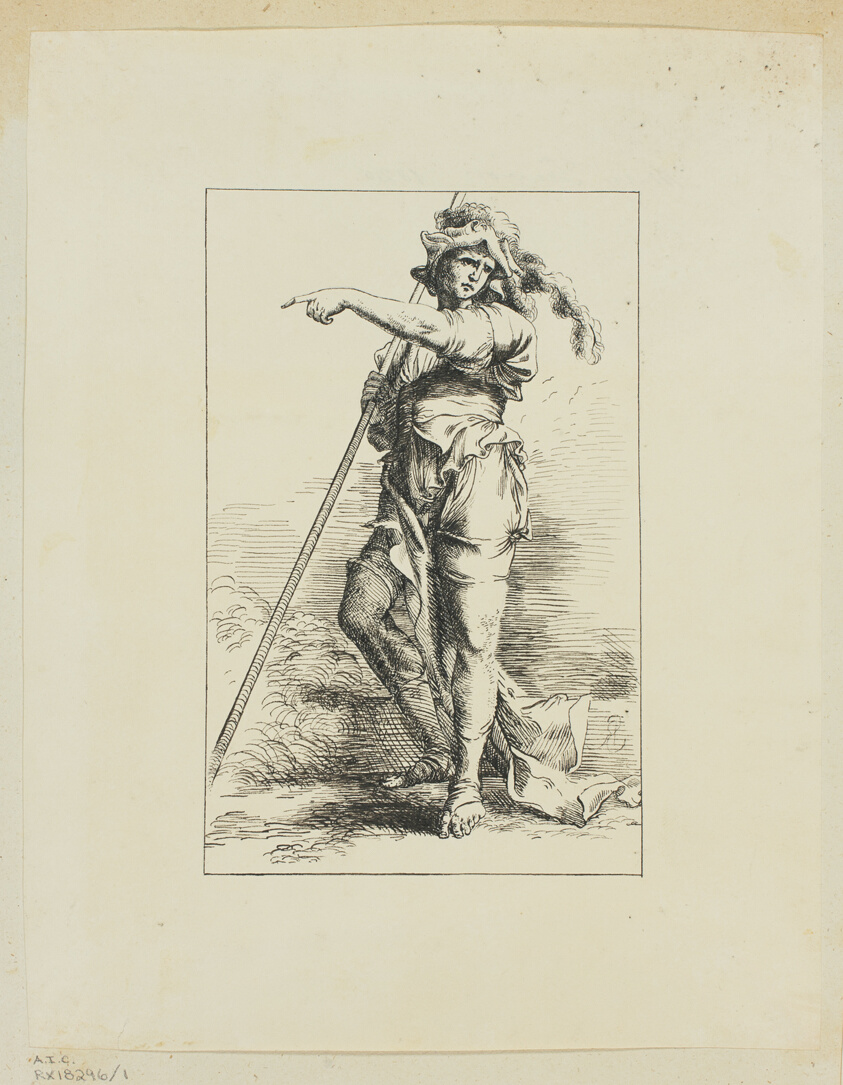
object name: Print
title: Figure with Staff Pointing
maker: Unknown Artist (British, 17th century); after Salvator Rosa (Italian, 1615-1673)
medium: Woodcut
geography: United Kingdom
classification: woodcut; print; prints and drawing